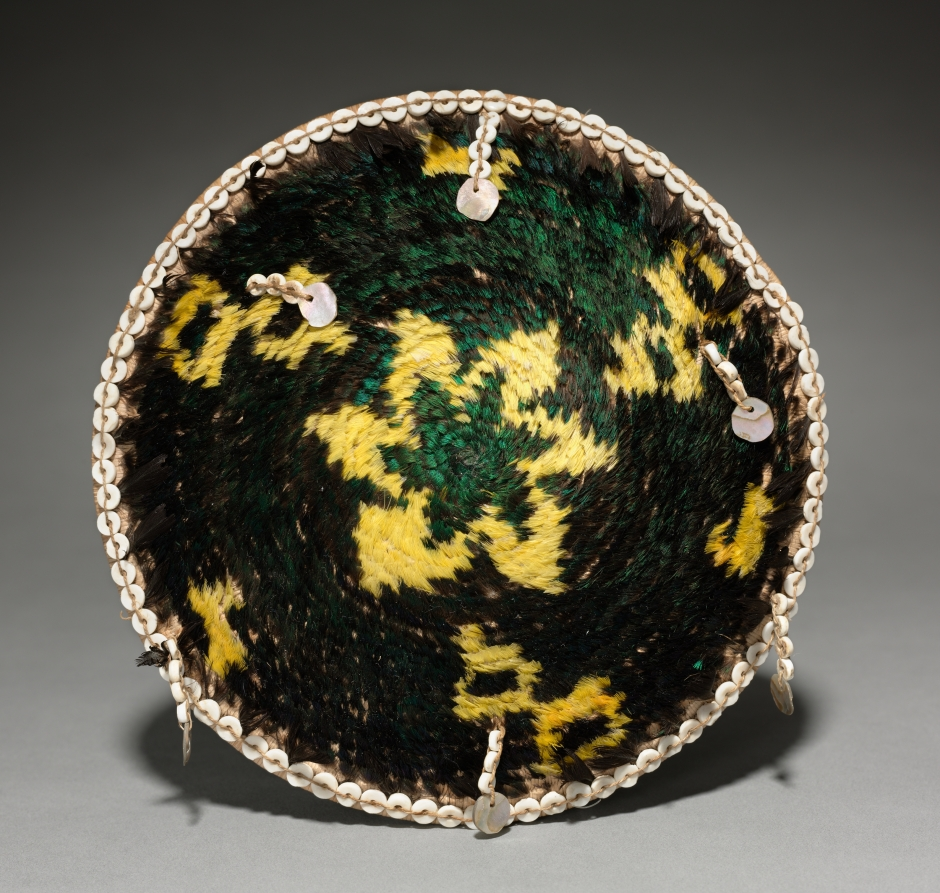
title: Gift Bowl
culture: California, Pomo, Late 19th- Early 20th century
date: c. 1905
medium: Sedge with mallard, meadowlark, and quail feathers, and shells; coiled (3 rods)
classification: Basketry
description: Although this basket probably was not made for native use, the feathered basket is based on an older type that was exchanged among natives as a treasured gift on such occasions as ceremonies that marked the stages of life. The feathers and shell beads are symbols of prestige and wealth.